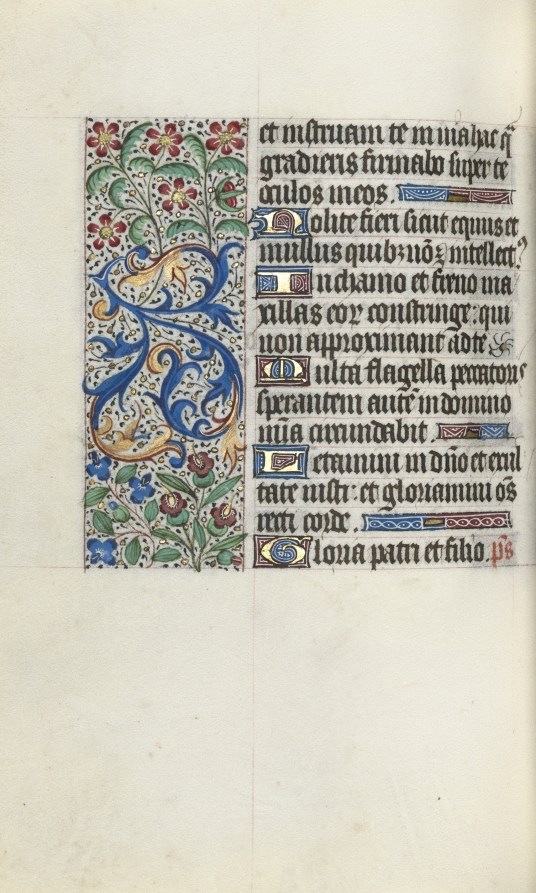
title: Book of Hours (Use of Rouen): fol. 82v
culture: France, Rouen, 15th century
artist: Master of the Geneva Latini (French, active Rouen, 1460–80)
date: c. 1470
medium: ink, tempera, and gold on vellum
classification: Bound Volume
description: In the late 1400s and early 1500s Rouen was an established and important center of book production. The city’s cathedral had a wealthy chapter that spent large sums of money to commission books and to maintain its extensive library. The stationers and booksellers would have likely been concentrated in or near the cathedral precinct. This artist, named after a manuscript now in Geneva, was Rouen’s principal illuminator during the second half of the 1400s.